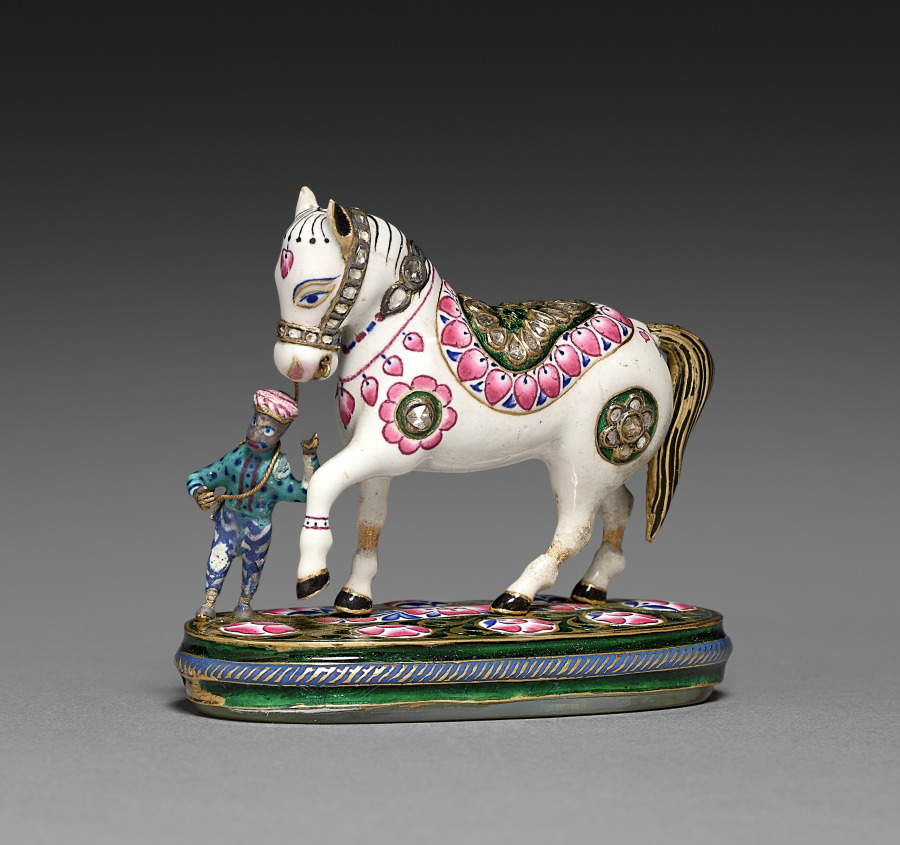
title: Ladies Hand Mirror with Horse as Handle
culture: India, Jaipur, late 18th-19th Century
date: late 1700s-1800s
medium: enamel inlaid with semi-precious stones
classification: Enamel